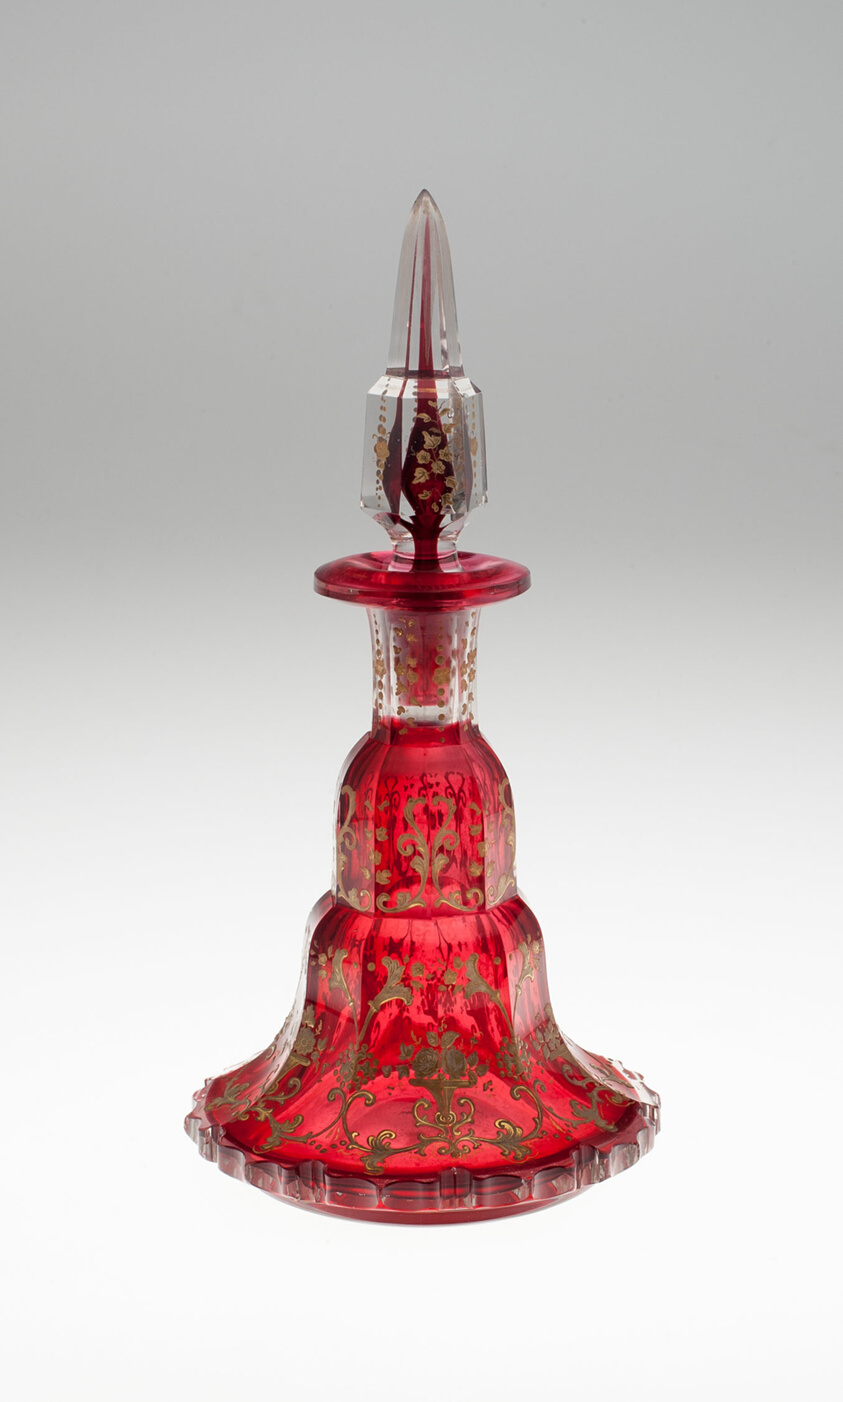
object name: Glass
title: Scent Bottle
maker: Bohemia, Czech Republic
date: Mid to late 19th century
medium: Glass; blown, cut, stained red, engraved and gilded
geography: Bohemia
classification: glass; european decorative arts